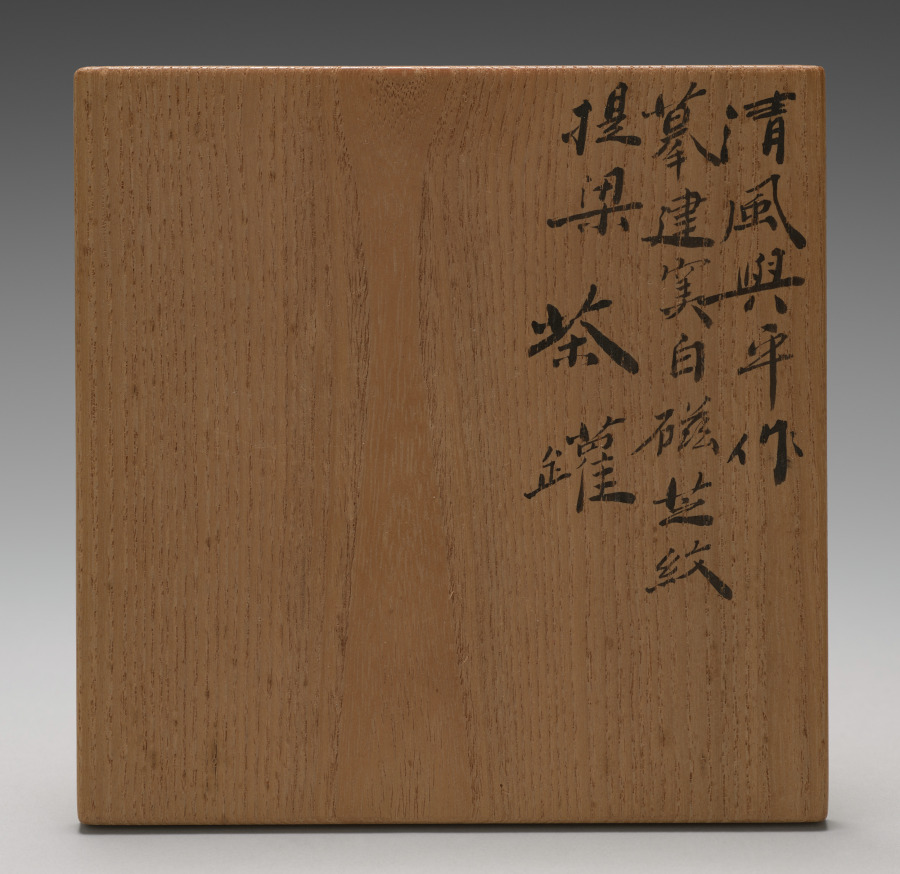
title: Teapot with Ruyi Motifs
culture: Japan, Meiji period (1868–1912)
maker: Seifū Yohei III (Japanese, 1851–1914)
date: 1893–1914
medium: Porcelain with molded design and iron handles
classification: Ceramic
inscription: The base of the pot has a “Seifu” seal.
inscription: Inscription on the box dated to 1960.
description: The simple, round form of this teapot is embellished with only a pair of nyoi staff-head motifs, one on each side. Two arched iron handles, parallel to each other, are hooked through holes in raised tabs at the front and back of the shoulders of the pot. The round lid is depressed so that an iron ring handle fastened with an iron clamp passing through the lid can lie flat inside the recessed area. The box is not original to the piece and has an inscription dated to 1960. The person who wrote it clearly admired Yohei III and his efforts to produce works that resembled Chinese ceramics. The inscription describes Yohei’s journey to perfecting these copies but misidentified the Chinese kiln whose wares were the basis for this particular work.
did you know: The base of the pot has a “Seifu” seal.